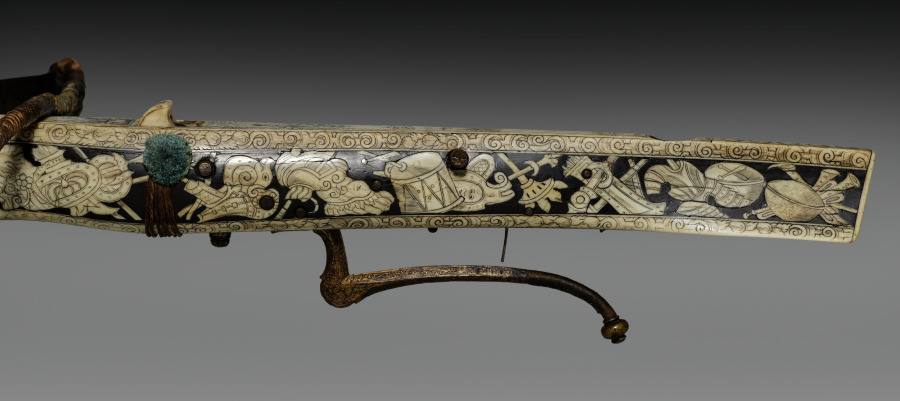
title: Crossbow of Elector Augustus I of Saxony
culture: Germany, Saxony, 16th century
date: c. 1553–73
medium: wood (walnut?), bone veneers, flax cord, steel (etched, traces of gilding). woolen pompoms, stock decorated wih inlaid trophies of arms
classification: Arms and Armor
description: This crossbow was a hunting weapon for Prince Elector Augustus I, a member of the ruling elite in the Holy Roman Empire. Augustus, powerful and wealthy, had even the most practical instruments ornately decorated, including this crossbow and its cranequin, or winding device.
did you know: Augustus was a marksman who took part in crossbow competitions. He had a large collection and often gave them to friends.